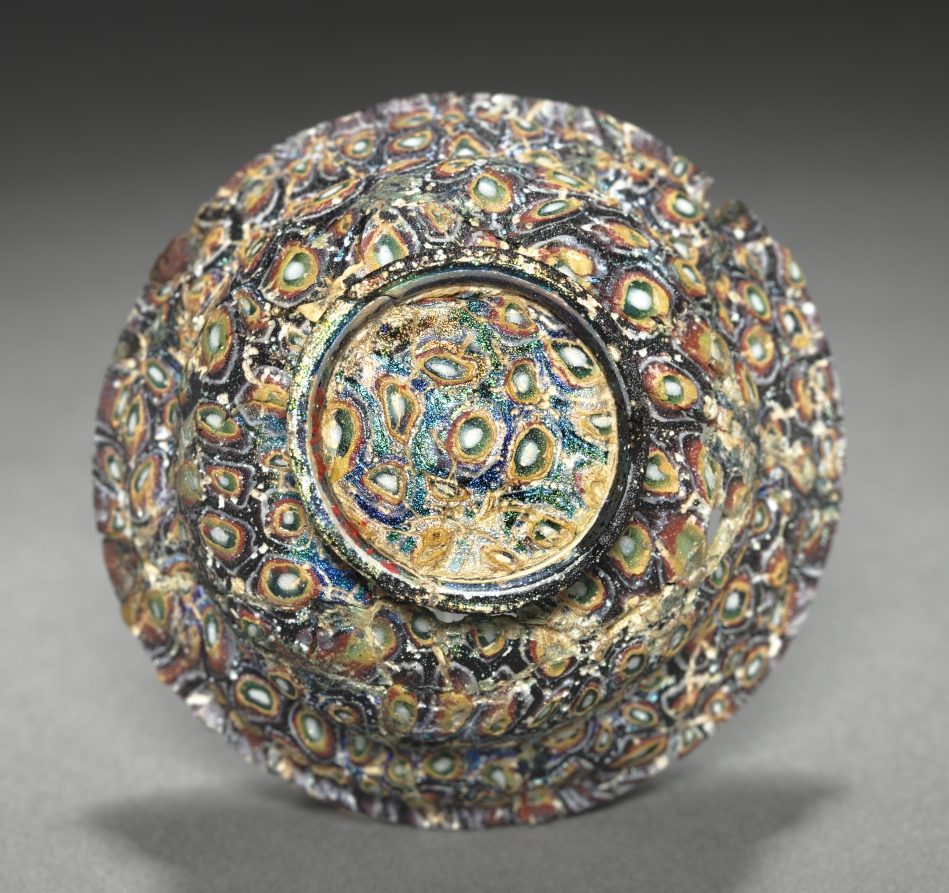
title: Millefiori Bowl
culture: Italy, Roman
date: 1–100 CE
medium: glass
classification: Glass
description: Mosaic glass, also called millefiori, was cast in a two-part mold. Fused glass rods of different colors were bundled together into patterns, then sliced into disk-shaped cross sections. These were placed within the mold and heated until fused. After cooling, the vessel’s surface was fire- or wheel-polished.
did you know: Millefiori, Italian for “thousand flowers,” describes the ancient glass-making technique later revived by Venetian artisans.